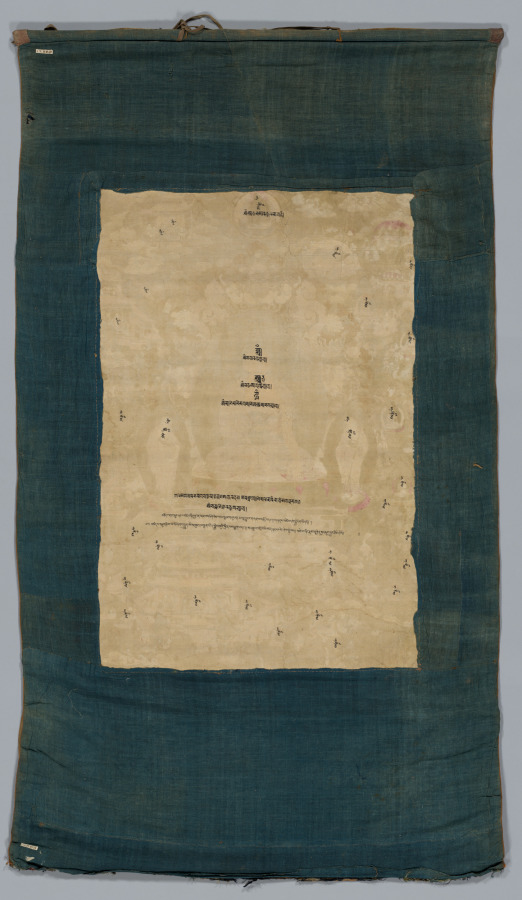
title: Shakyamuni Buddha with scenes from his life story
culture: Tibet, Qing dynasty (1644–1911)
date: c. 1700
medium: gum tempera on cloth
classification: Painting